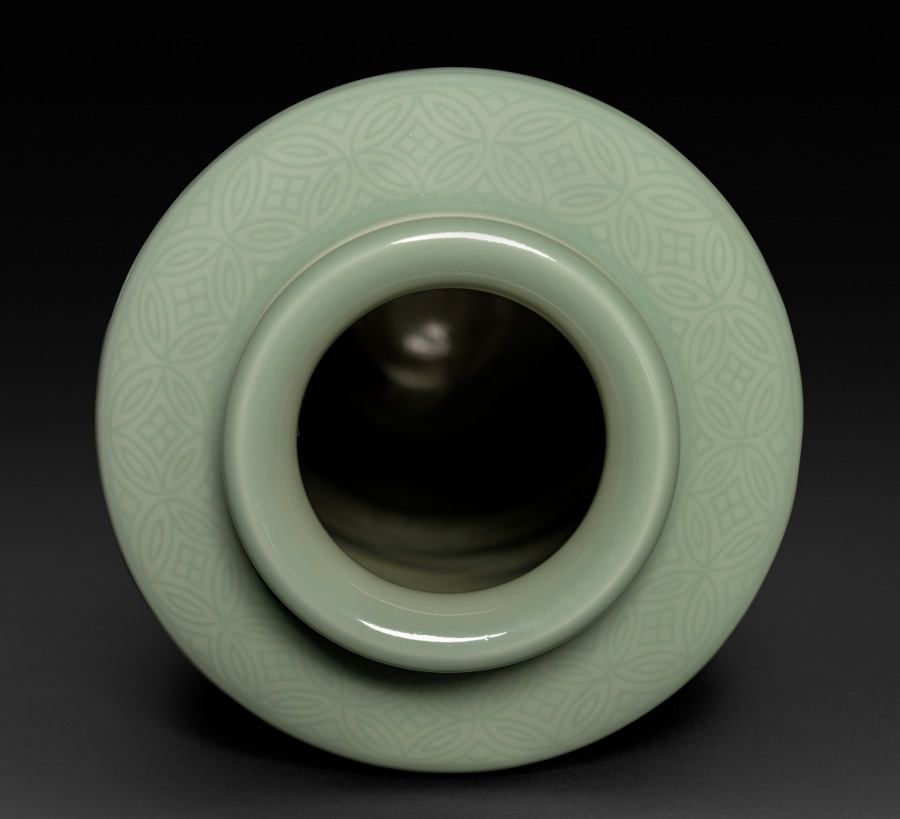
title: Tong-Shaped Vase with Flowers and Grasses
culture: Japan, Taishō period (1912–26) or Shōwa period (1926–89)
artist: Seifū Yohei IV (Japanese, 1872–1951)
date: 1914–46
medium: Porcelain with molded and carved design and green glaze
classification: Ceramic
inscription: 清風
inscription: 彫画 / 青磁花瓶 / 清風造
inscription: 青磁花瓶 / 彫画 【印】清風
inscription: 清風造 【印】成山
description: Many of the vases created by Yohei III and IV were made with reference to and in emulation of Chinese ceramics in both form and glazing. The vessel type called tongping, pronounced tōbin in Japanese, is tall and cylindrical, like the thick length of bamboo referenced in the shape of the ideograph tong 筒. Unlike the ancient gu, hu, and guan, this form did not emerge in China until the Ming dynasty, and many such vases date to the early Qing dynasty. Two green-glazed vases, CMA 2022.225 by Yohei III and this one by Yohei IV, are interpretations of this form. Yohei III’s version has slightly hunched shoulders and is somewhat wider at the top below the small neck and lip. Yohei IV’s vase is more angular. The wide rack of molded cloud encircling the Yohei III vase rises subtly from very low relief banding above and below it, accentuating the vessel’s rounded edges and complementing the form. In contrast, the allover flower vine pattern on the body and “seven treasures” pattern at the collar of the vase by Yohei IV evokes a garment’s cuffed sleeve, like the common English appellation for this type of vessel—“sleeve vase.”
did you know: Seifū Yohei IV continued to create works in the studio’s signature colors but also produced pieces with strong color and flare that were his interpretations of Qing dynasty (1644–1911) glazes.